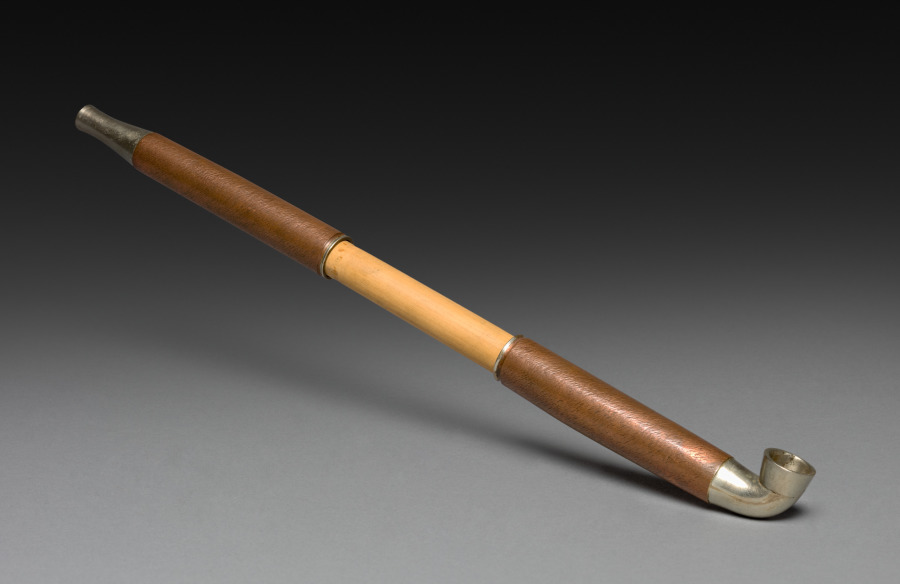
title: Tobacco Pipe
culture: Japan, Edo period (1615–1868) to Meiji period (1868–1912)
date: 1800s–early 1900s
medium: bamboo and metal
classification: Miscellaneous